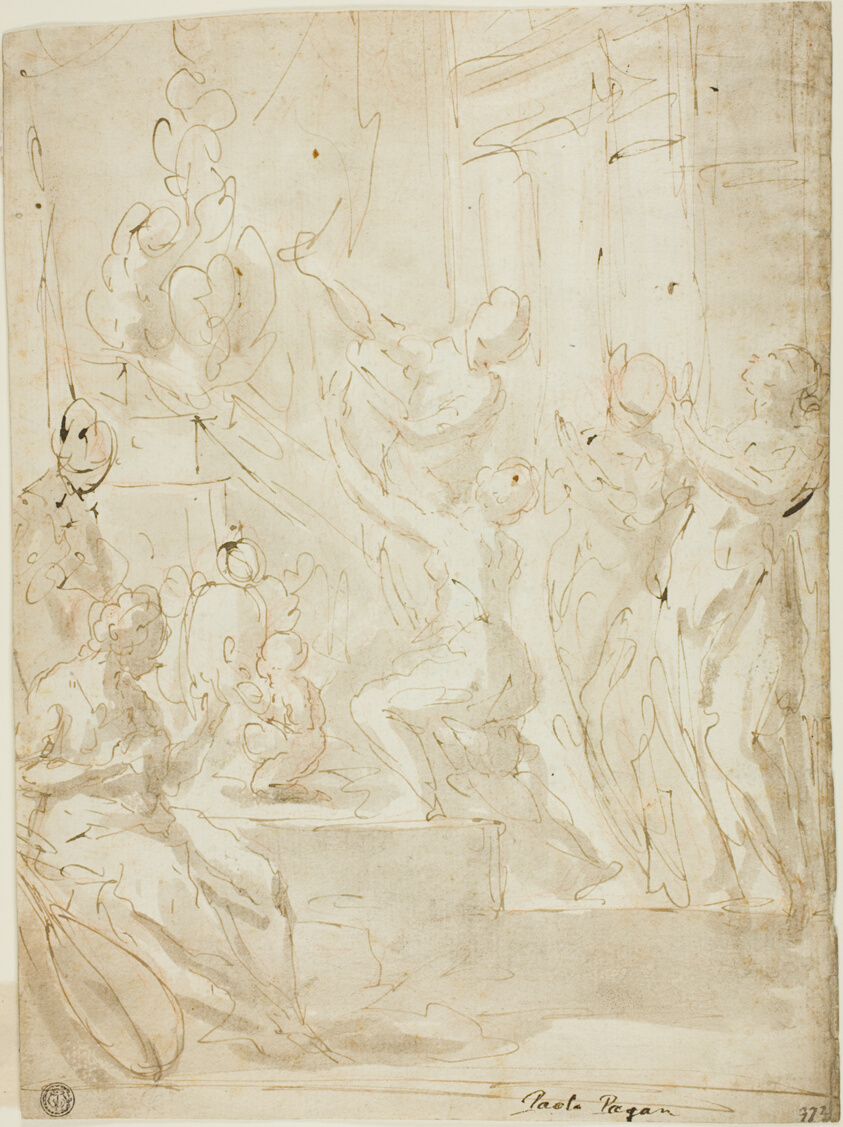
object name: Drawing and Watercolor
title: Figures at an Altar or Classical Sacrifice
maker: Paolo Pagani (Italian, c. 1661-1716)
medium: Pen and brown ink, with brush and brown wash, over red and black chalk on ivory laid paper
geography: Italy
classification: pen and ink drawings; drawings (visual works); prints and drawing